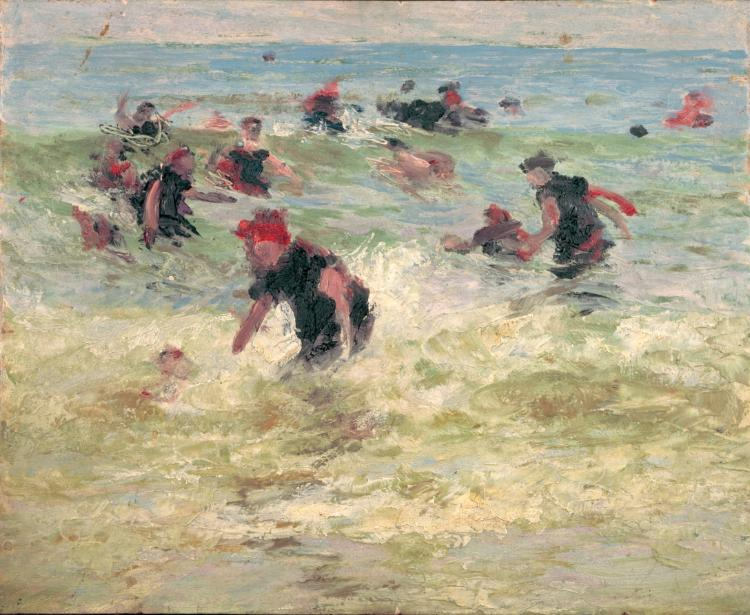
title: Beach Study (verso)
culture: America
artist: Edward H. Potthast (American, 1857–1927)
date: c. 1910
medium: oil on panel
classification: Painting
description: Born in Cincinnati, Potthast studied in Munich and Paris before returning to the United States, where he began spending summers along the coast of New England. There he studied the carefree seaside activities of bathers and picnickers. Although he never married, he was particularly fond of painting young mothers and their children.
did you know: During the early 1900s, modesty dictated women’s bathing suit designs featuring long, loose-fitting skirts.